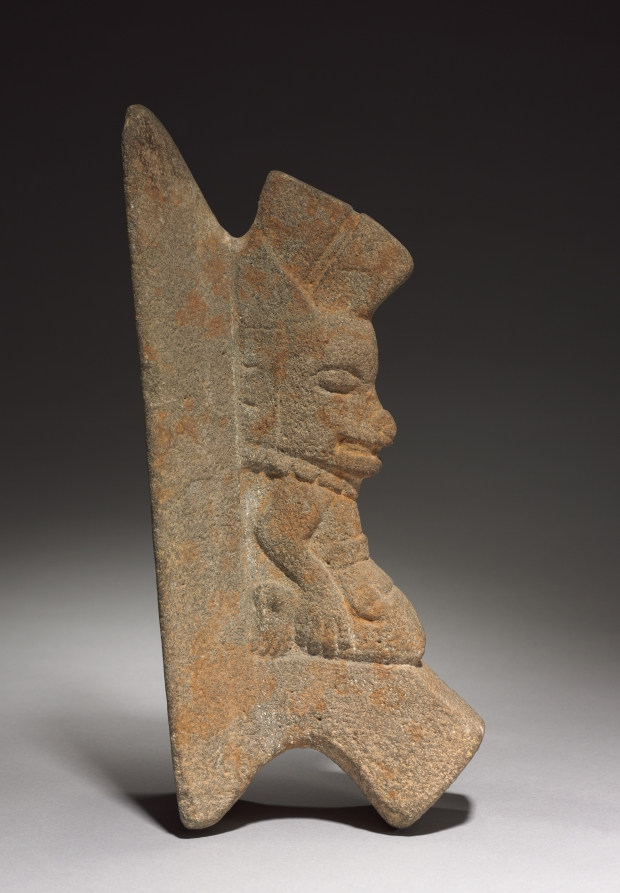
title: Animal Palma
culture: Mexico, Veracruz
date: 600–1000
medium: gray volcanic stone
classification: Sculpture